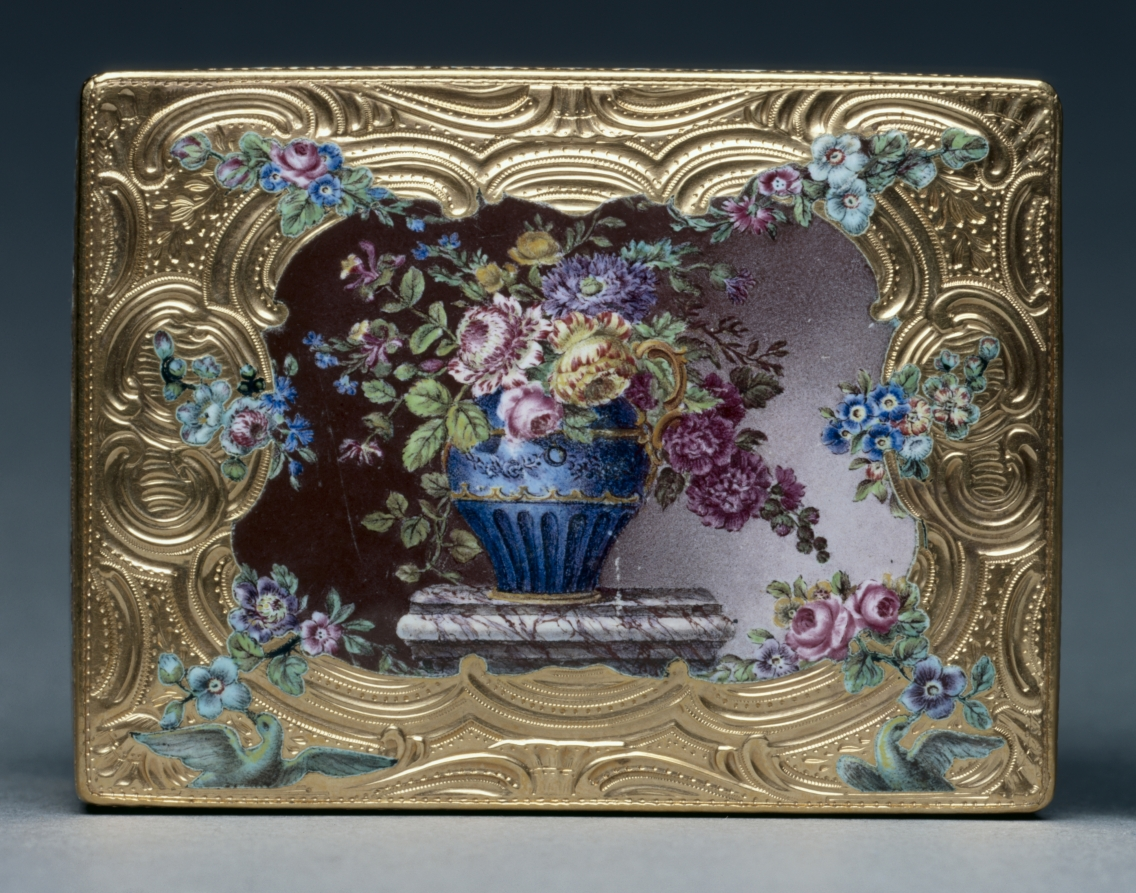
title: Snuff Box (Tabatière)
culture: France, 18th century (style of Louis XV)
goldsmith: Francois Guillaume Tiron (French)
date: 1756–57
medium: gold and enamel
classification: Miscellaneous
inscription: [Maker's mark of Francois-Guillaume Tiron, master goldsmith in 1747, inside cover; left wall]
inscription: [Warden's mark for Paris, 1756-1757, inside cover]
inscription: [Charge mark of Julien Berthe, Paris, 1750-1756, inside cover; left wall]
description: The miniature paintings that decorated snuff boxes were depicted in intricate detail requiring complex technical skill. This box’s miniatures are painted with enamel en plein, meaning the enamel has been applied directly to the metal of the box. A different enameling technique, basse-taille, is used to depict the doves and floral borders. Here, the gold has been chiseled away and filled with translucent enamel in order to produce a three-dimensional effect.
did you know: In the mid-1700s François-Guillaume Tiron worked alongside his brother, Jean-Marie Tiron, one of the most celebrated makers of gold boxes of the 18th century.